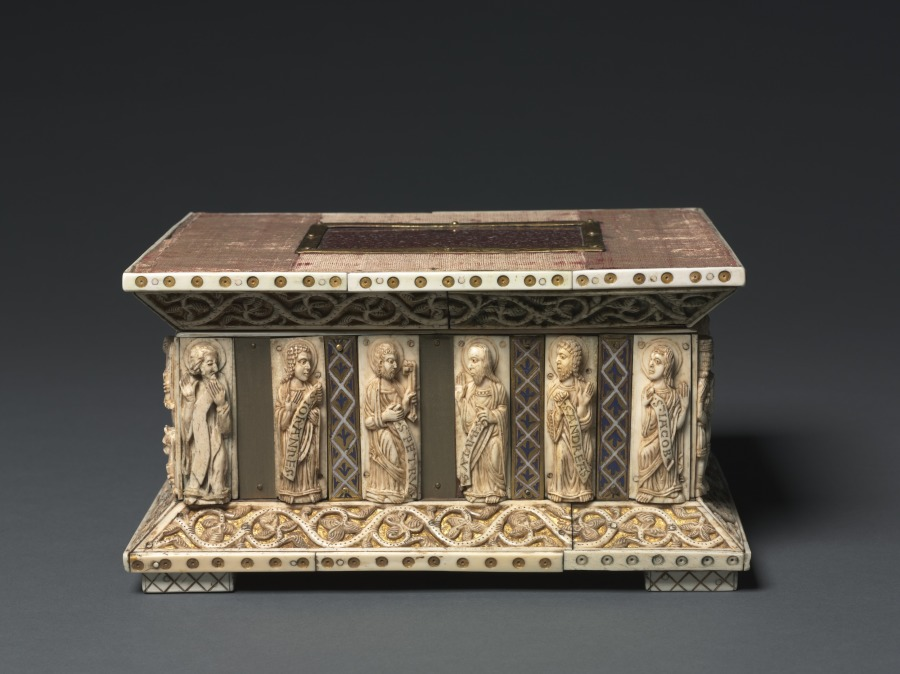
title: Portable Altar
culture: Germany, Cologne, Gothic Period, 13th century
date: c. 1200–1220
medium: walrus ivory, gilded copper, porphyry, champlevé enamel, wood core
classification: Ivory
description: The principal decoration of this portable altar is carved of walrus ivory. On the long sides are traditional figures of standing apostles. On the short sides are the seated Virgin with the Magi, and Christ the Judge between the symbols of the Evangelists. The commercial ties between the Rhineland and the Norse peninsula made walrus ivory easily available to the city of Cologne, one of the most important artistic centers in medieval Germany.